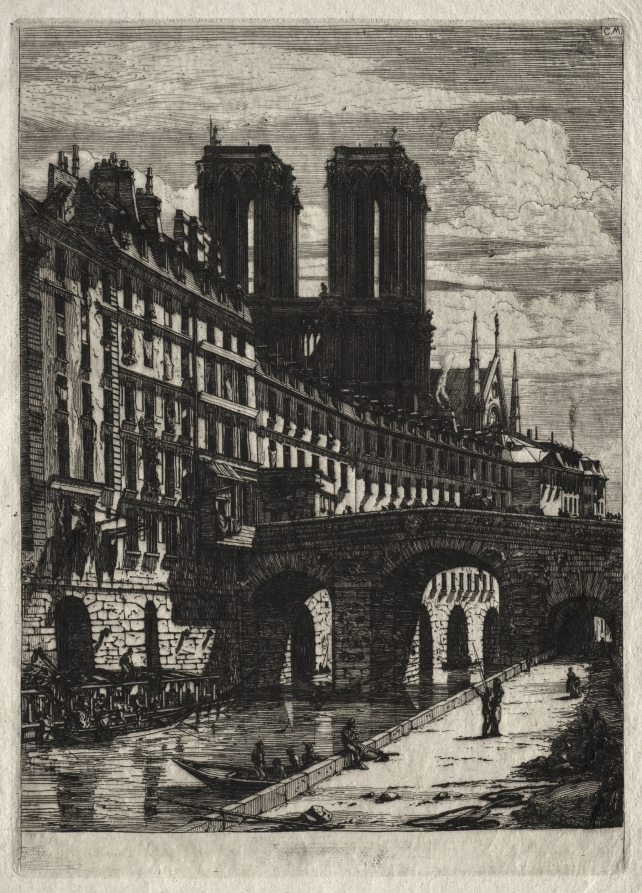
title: Etchings of Paris: The Little Bridge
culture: France, 19th century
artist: Charles Meryon (French, 1821–1868)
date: 1850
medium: etching and engraving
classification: Print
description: Although Meryon made the first study for this scene with a camera lucida (an apparatus containing a prism or an arrangement of mirrors that reflects the image on a surface so that its outlines may be traced), the artist then made changes to improve the composition—extending the height of the towers of Notre-Dame, for instance. Meryon did not mean his plates to have the precision of a photograph. Rather, he combined two views—a sketch from a low point at the water's edge and a view from the parapet—which, although not totally accurate, are believable. Charles Baudelaire (1821–1867) reported in a letter that he discussed this print with the artist who claimed "that the shadow cast by a portion of the stonework on the side wall of the Pont Neuf looked exactly like the profile of a sphinx; that this was entirely coincidence on his part and only later did he take note of this peculiarity."